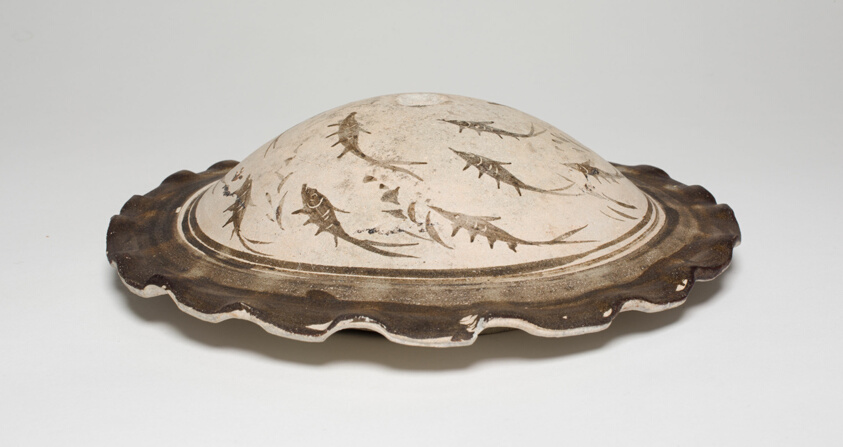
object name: Vessel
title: Jar Lid with Fish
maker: China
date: Southern Song dynasty (1127–1279), early 13th century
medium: Jizhou ware; stoneware painted with underglaze iron slip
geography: Jiangxi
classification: ceramics